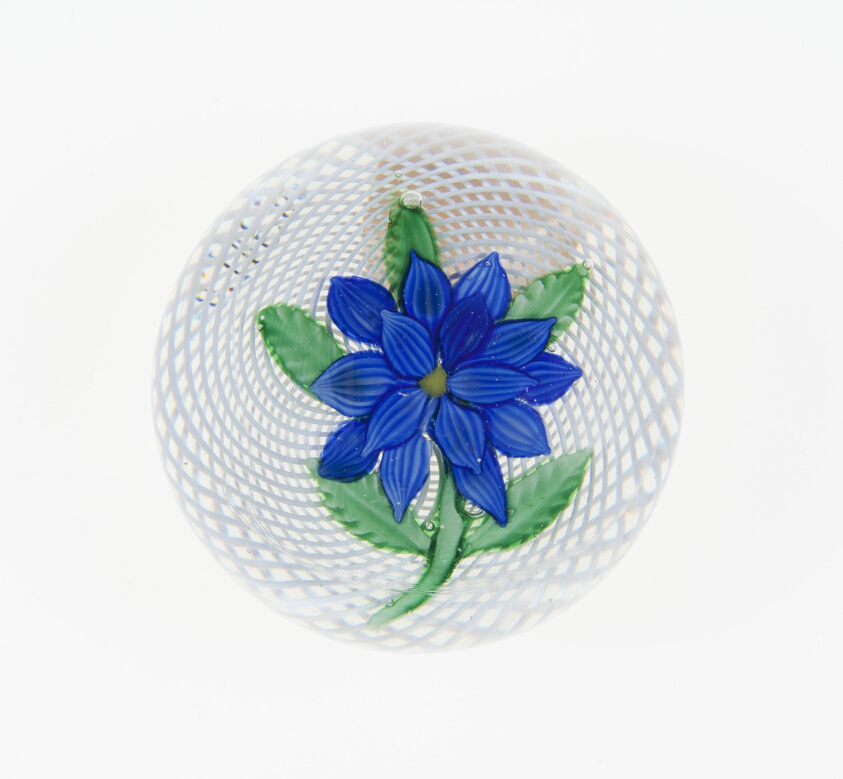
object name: Glass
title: Paperweight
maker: Saint-Louis Glassworks (Cristalleries de Saint-Louis); Lorraine, France, founded 1586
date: c. 1845–60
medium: Glass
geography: Saint-Louis-lès-Bitche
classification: paperweight; glass